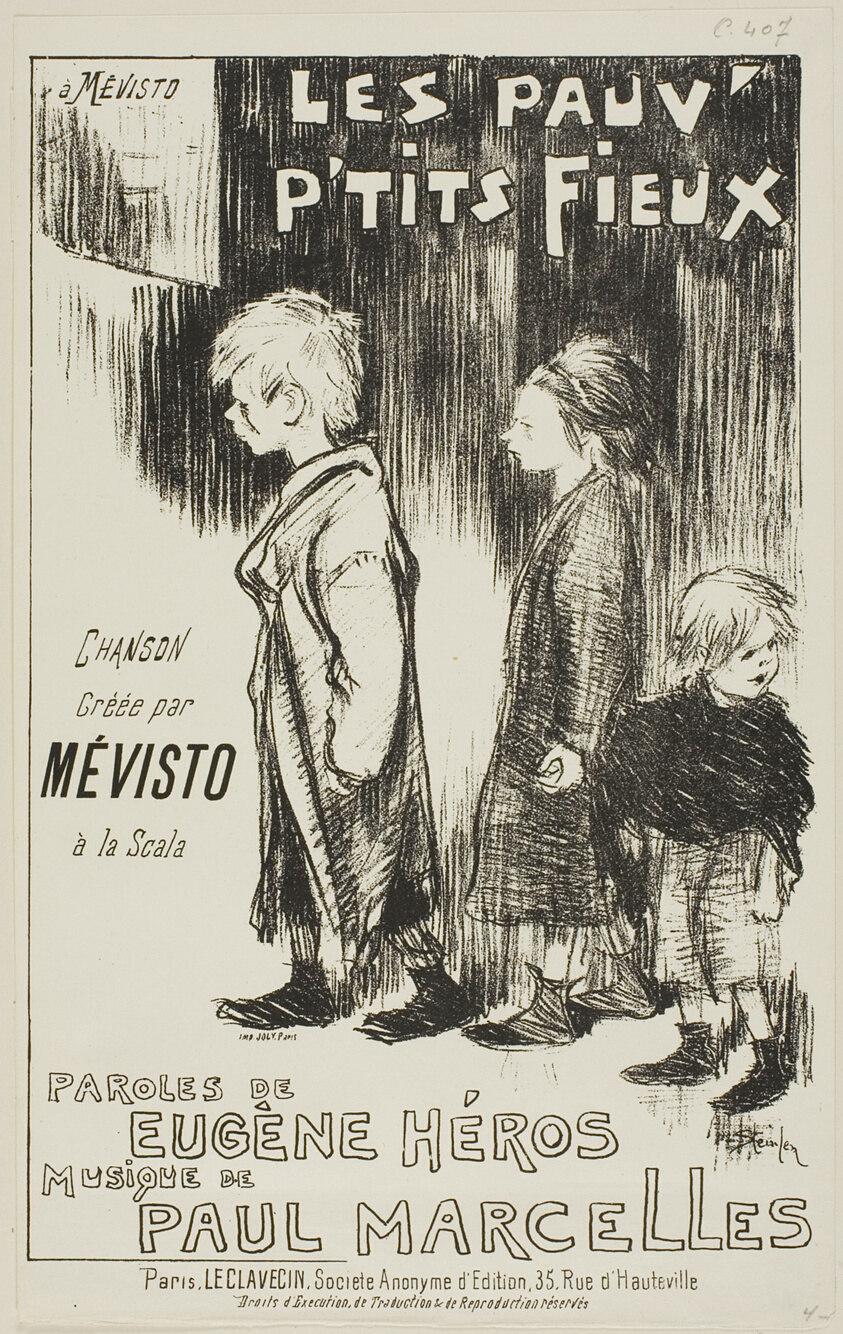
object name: Print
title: Les Pauv' P'tits Fieux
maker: Théophile-Alexandre Steinlen; French, born Switzerland, 1859-1923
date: 1892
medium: Lithograph in black on cream wove paper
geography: France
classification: lithograph; print; prints and drawing